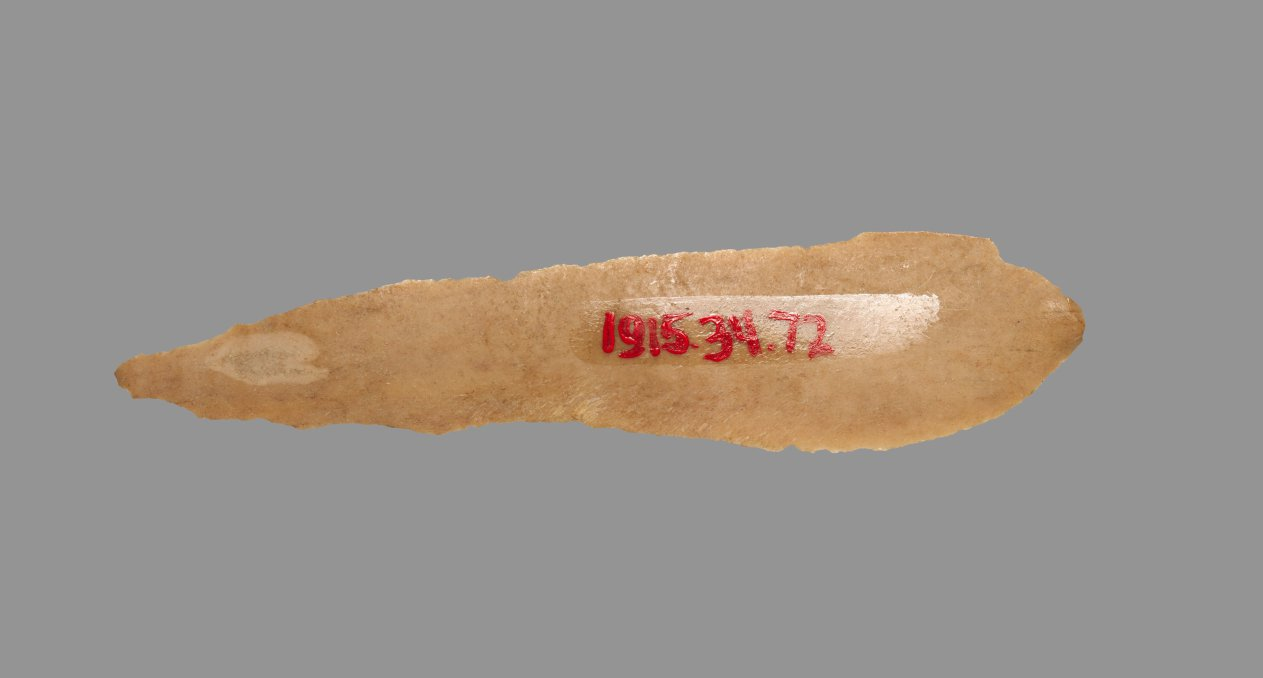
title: Sickle Blade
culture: Egypt, Middle Kingdom (2040–1648 BCE), Dynasty 12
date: 1980–1801 BCE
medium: flint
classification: Implements